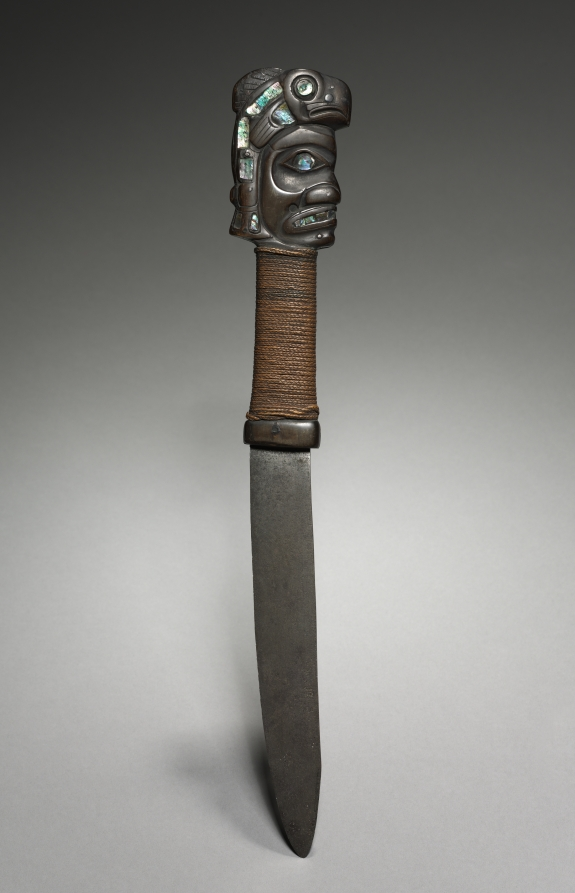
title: Dagger (Gwálaa)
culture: Native North America, Northwest Coast, Alaska, Tlingit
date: late 1800s–early 1900s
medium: Metal, shell, leather, fiber, ivory or horn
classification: Arms and Armor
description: After Europeans introduced firearms, the Indigenous Northwest Coast dagger transformed from a weapon into a status symbol worn in a sheath that hung from the neck. That may be the case with this example, which depicts a head surmounted by a fish, perhaps a salmon.